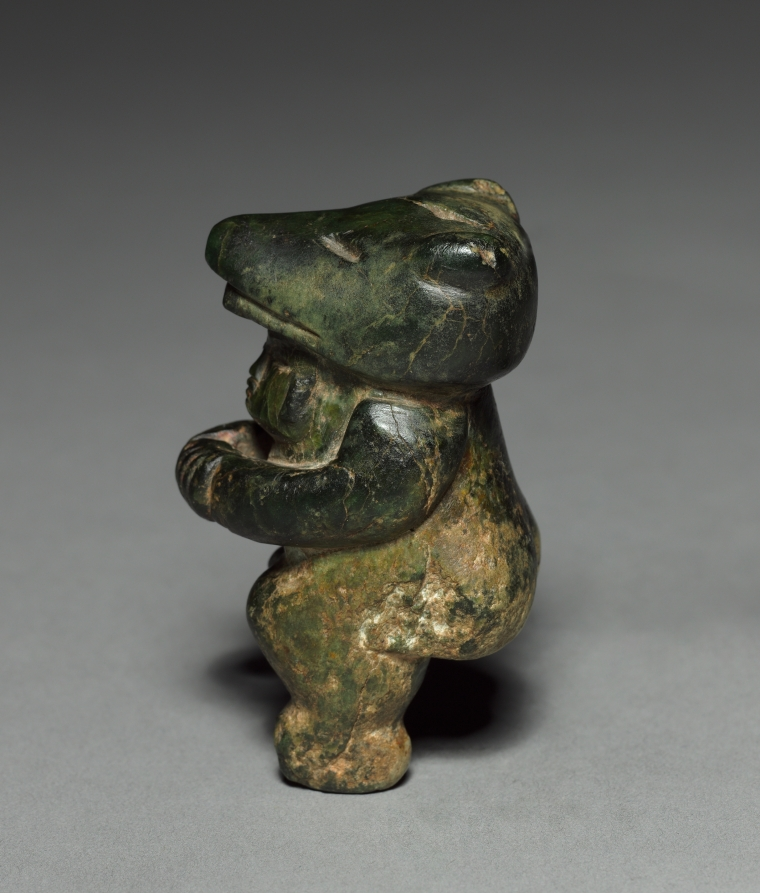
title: Figurine with Animal Headdress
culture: Pre-Columbian style(?), 20th century (?)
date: 20th Century(?)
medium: serpentine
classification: Sculpture